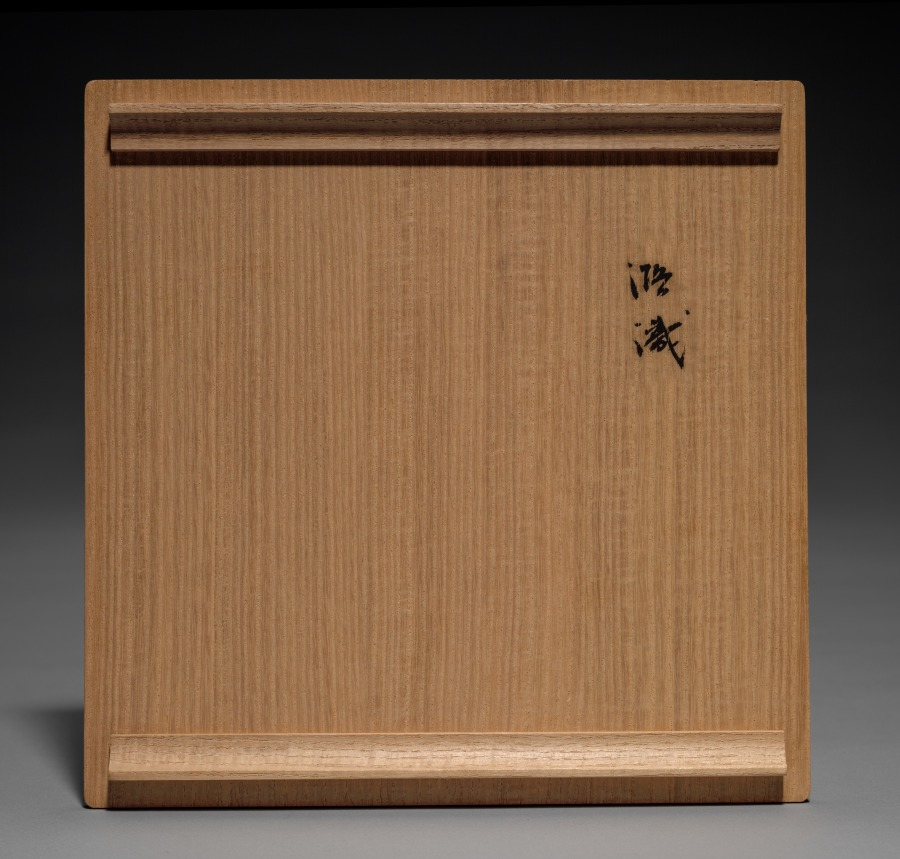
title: Dish with Lotus in Rui-Head-Shaped Cartouches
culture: Japan, Edo period (1615–1868)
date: mid-1800s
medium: Porcelain with underglaze blue and overglaze enamel (Hizen ware, Nabeshima type)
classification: Ceramic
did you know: A ruyi is a curved decorative object with a head like a cloud or lingzhi mushroom.